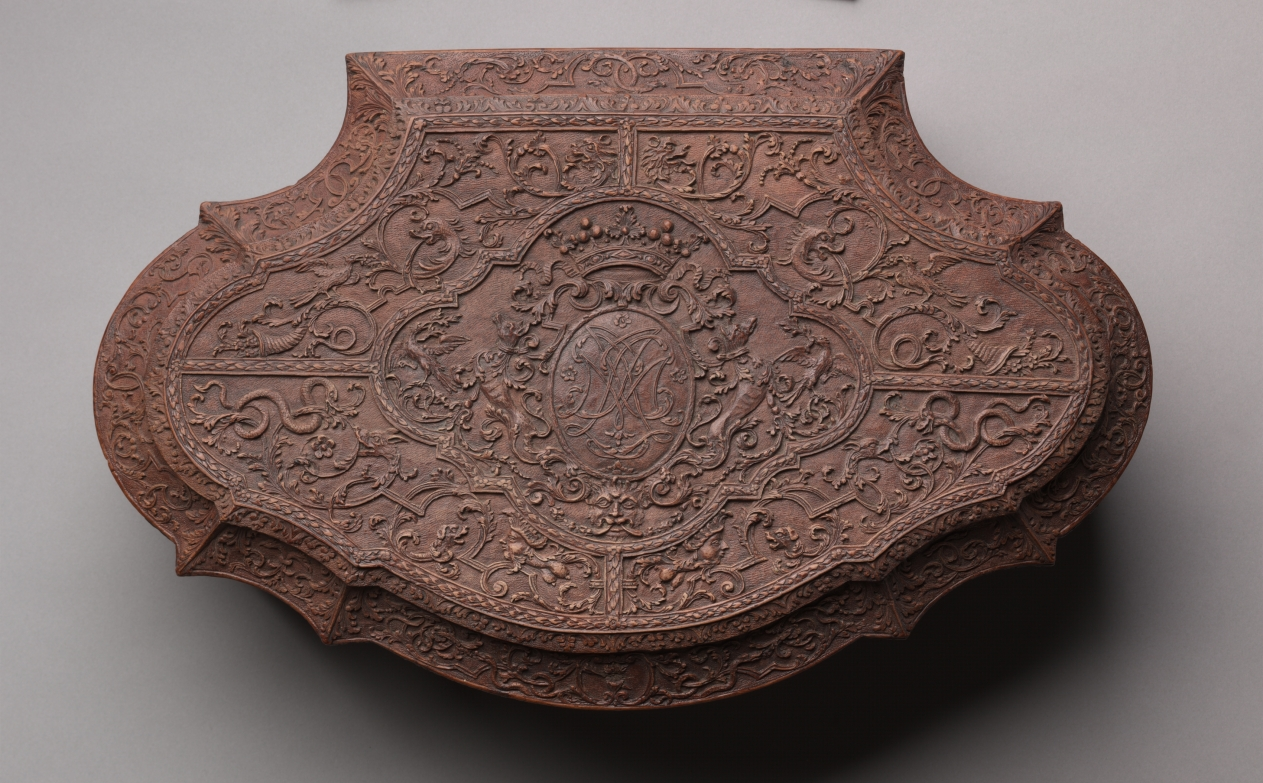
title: Box (2 of 2)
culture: France, Nancy, early 18th century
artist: Bagard (French)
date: early 1700s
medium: wood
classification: Furniture and woodwork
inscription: on top of lid, initials crowned by coronet